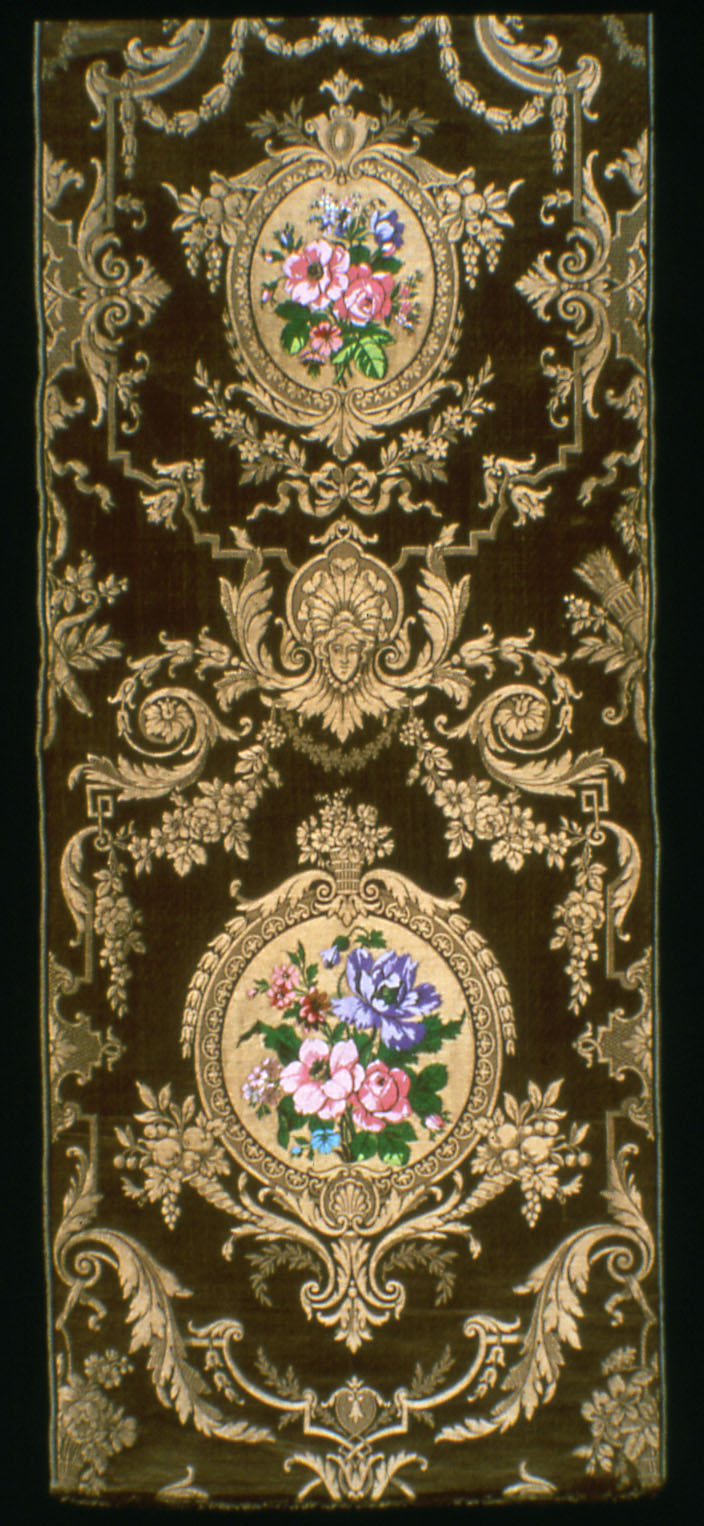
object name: Textile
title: Panel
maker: Produced by Mathevon et Bouvard, 1810–1895; France, Lyon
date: 1860/80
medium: Silk and linen, warp-float faced 7:1 satin weave with twill interlacings of secondary binding warps and supplementary patterning and brocading wefts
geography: Lyon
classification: textile; weaving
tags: flowers, medallions, Greek, foliage